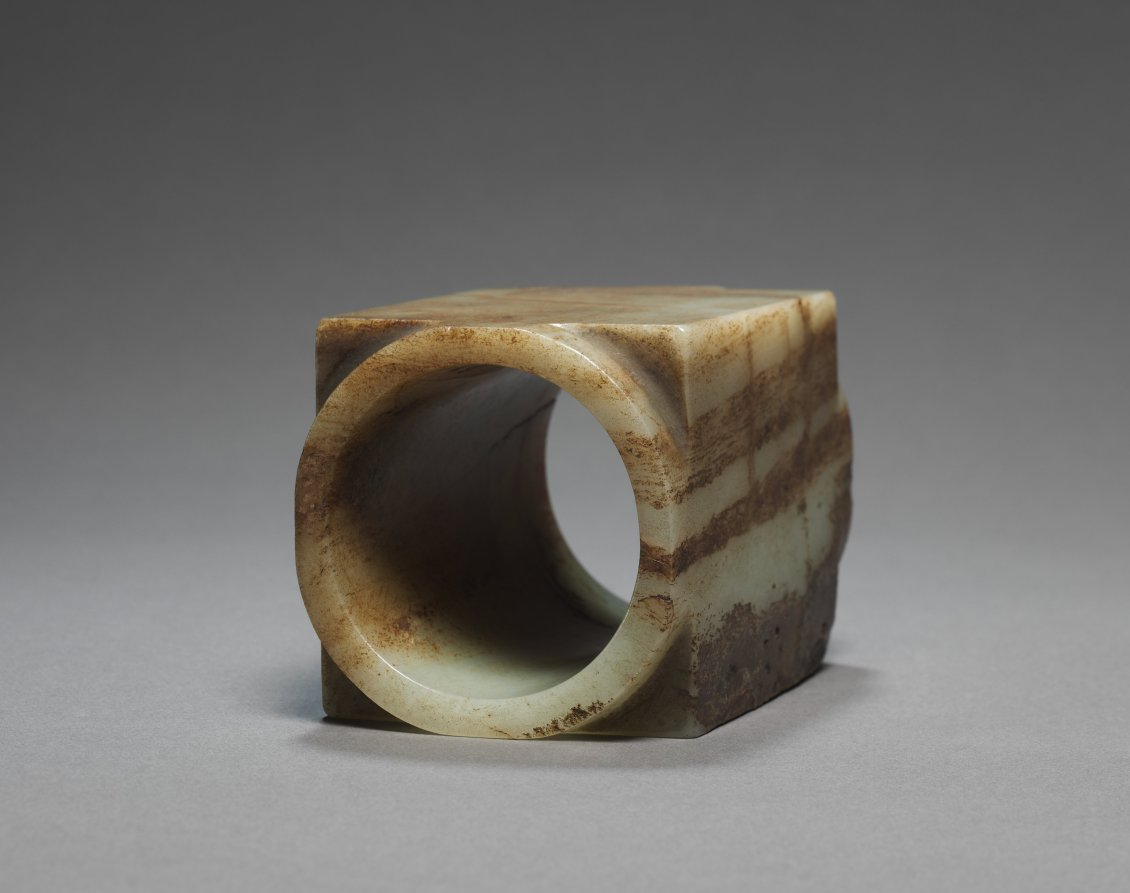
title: Cong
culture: China, Shang dynasty (c. 1600–c. 1046 BCE)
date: c. 1800–1400 BCE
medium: jade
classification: Jade